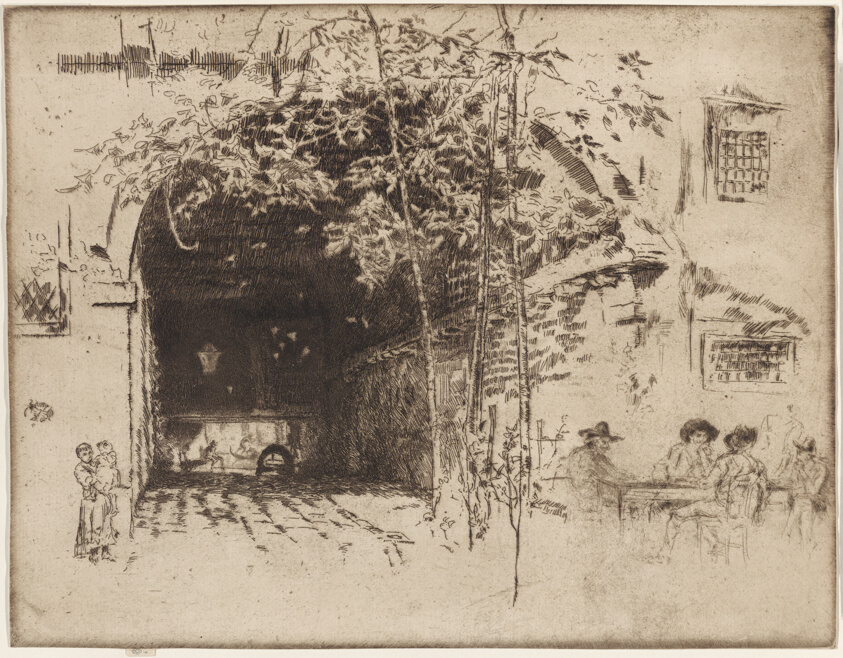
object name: Print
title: The Traghetto, No. 2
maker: James McNeill Whistler (American, 1834-1903)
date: 1880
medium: Etching and drypoint with foul biting in black ink on ivory laid paper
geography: United States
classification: etching; foul biting; print; prints and drawing; paper; drypoint